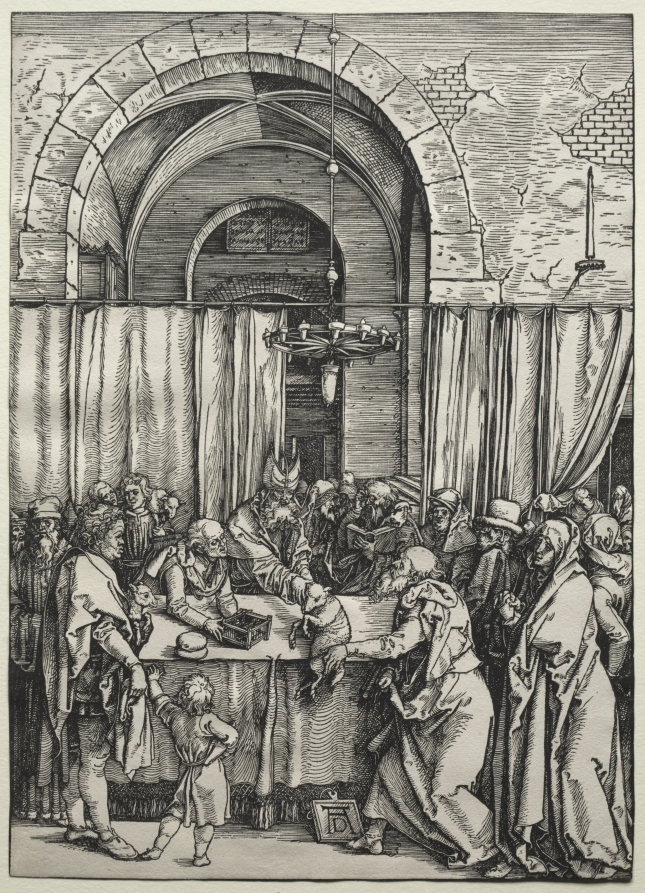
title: Joachim's Offering Rejected by the High Priest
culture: Germany, early 16th Century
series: The Life of the Virgin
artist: Albrecht Dürer (German, 1471–1528)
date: c. 1504–1505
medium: woodcut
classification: Print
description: The first three woodcuts of Dürer’s narrative (1959.99.2-4) portray the events leading up to the Virgin’s birth. According to an apocryphal text, Mary’s parents, Joachim and Anna, had remained childless into old age. After Joachim’s offering at the temple was rejected for this reason, the angel Gabriel appeared to him in the wilderness to announce that his wife would soon bear a child. At this news, the two tenderly embraced at the city’s gate.